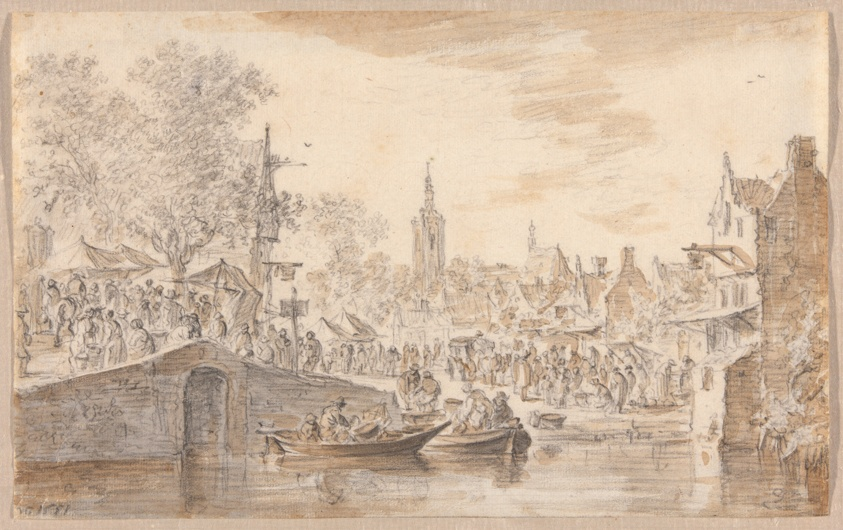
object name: Drawing and Watercolor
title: Market near a Canal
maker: Jan van Goyen (Dutch, 1596-1656)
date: 1651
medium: Black crayon and brush and brown and gray washes on ivory laid paper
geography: Netherlands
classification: graphite; drawings (visual works); prints and drawing